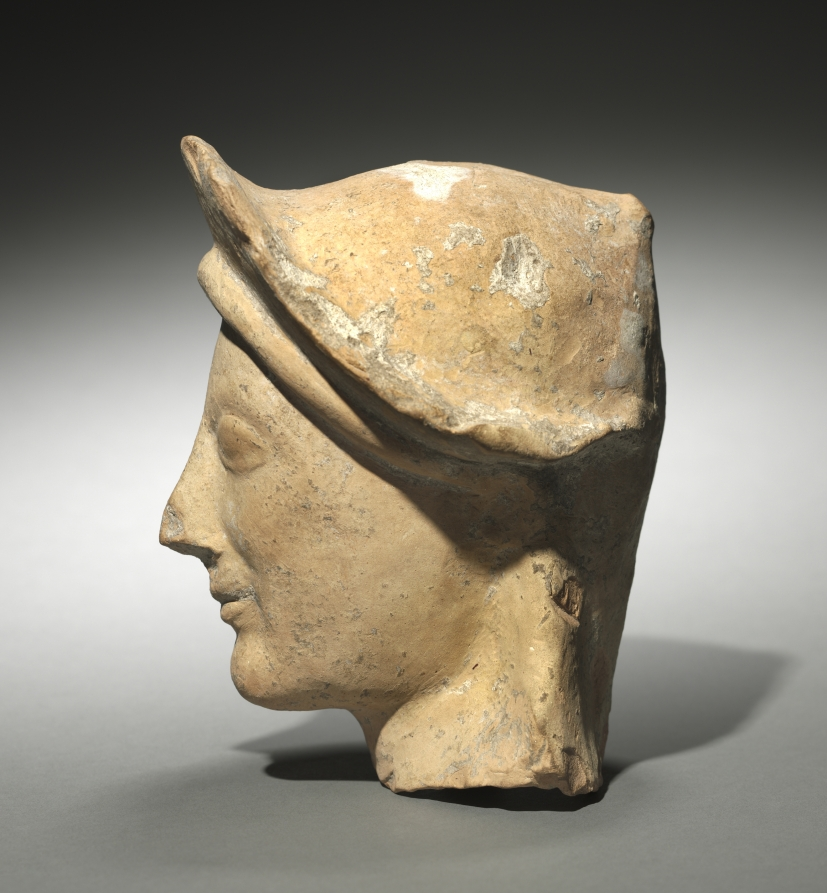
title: Woman's Head with Crown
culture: Greece, Sicily(?)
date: 500s BCE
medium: terracotta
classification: Sculpture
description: This terracotta sculpture depicts a woman with a wide headdress that is partly broken off. Her face is rendered in an Archaic style, with her mouth and eyes in low relief and her lips lifting upward in a serene smile. Originally, details such as the eyes and decoration on the headdress would probably have been painted on the surface of the sculpture.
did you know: In ancient Greek sculpture, a wide crown often denoted a matron deity like Hera or Demeter.